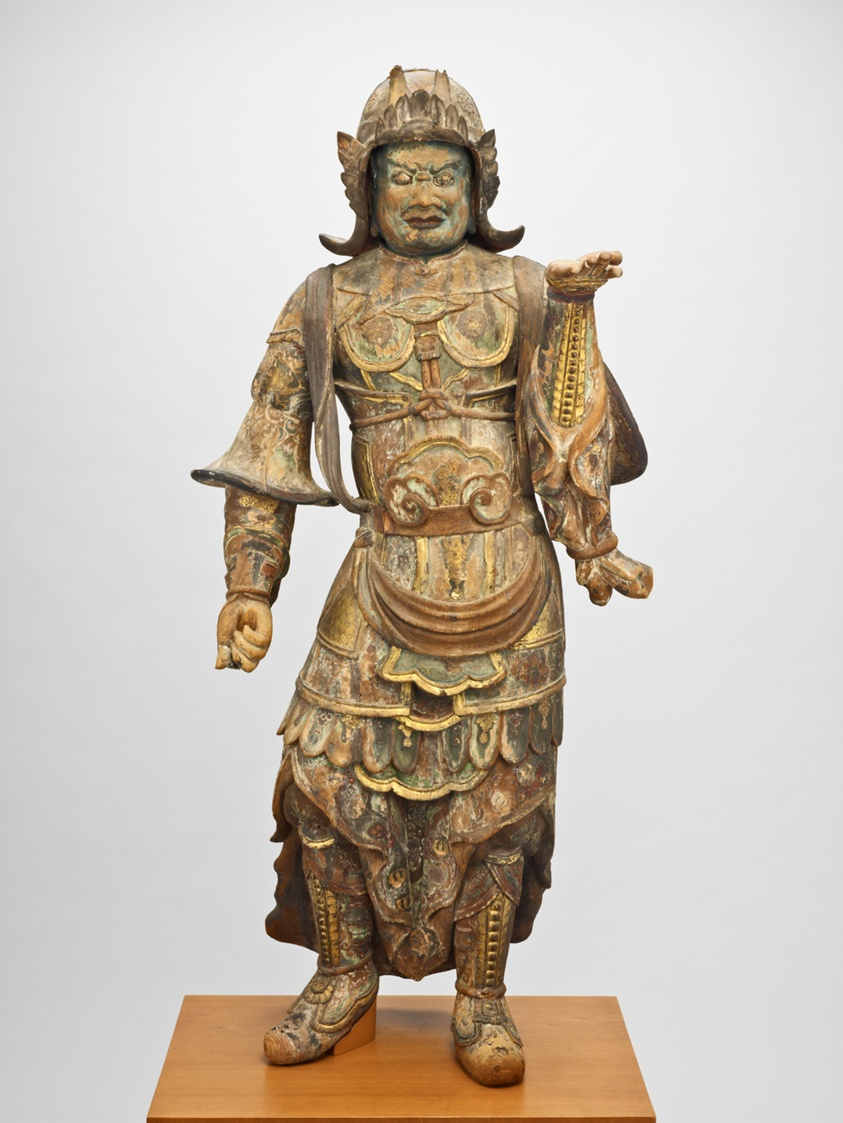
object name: Sculpture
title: Bishamon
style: Japanese (culture or style)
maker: Japan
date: 11th century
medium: Wood with traces of polychromy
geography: Japan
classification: wood; sculpture; asian art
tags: Buddhism, religion